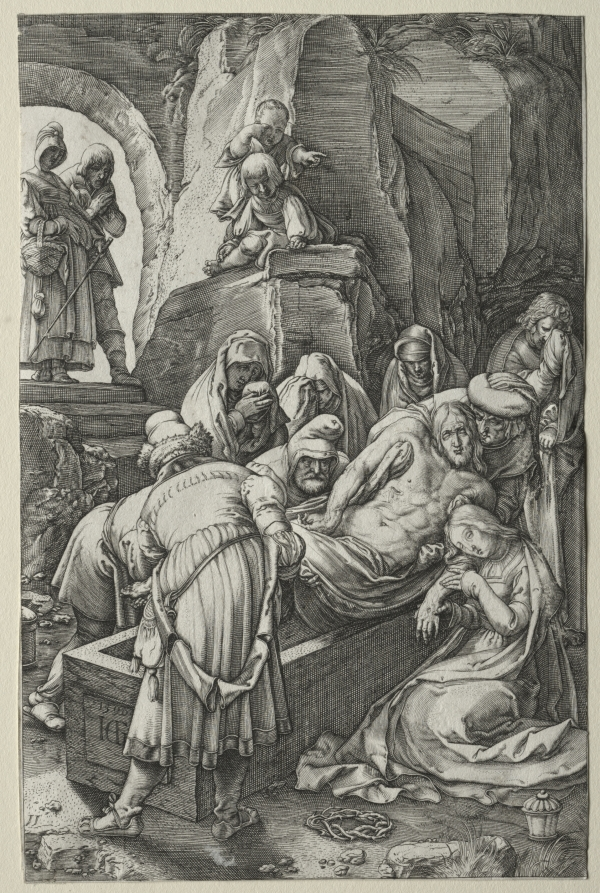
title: The Passion: The Entombment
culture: Netherlands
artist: Hendrick Goltzius (Dutch, 1558–1617)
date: 1596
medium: engraving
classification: Print